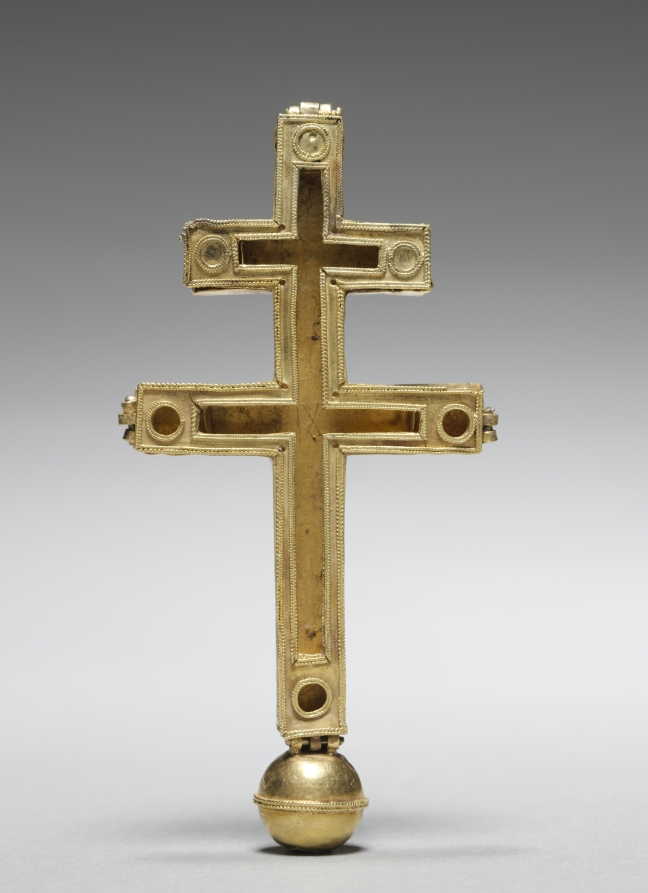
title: Double-Arm Reliquary Cross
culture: Latin Kingdom of Jerusalem, Jerusalem, Gothic period, 12th century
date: c. 1100–1200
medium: gold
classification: Metalwork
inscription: inscribed on center front: ECE: LIGNUM: VIVI: CRUCIS: FICE; at base: SUDARIUM DEI; at each end of main arm: ARUNDO DEI SPONGIA DEI. (Behold the Glorius Wood of the Living Cross: Sudarium of the Lord: Staff of the Lord: Sponge of the Lord).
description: This elegant double-arm cross once contained fragments of four of the most important relics of Christ’s Passion, namely a portion of the True Cross, a piece of Christ’s sudarium (sweat cloth), and fragments of the reed staff and sponge used by Christ’s tormentors to mock him and give him vinegar for his thirst during the Crucifixion. The identity of these relics and their placement in the cross are indicated by open cavities on the reliquary’s front and accompanying Latin inscriptions on its back.